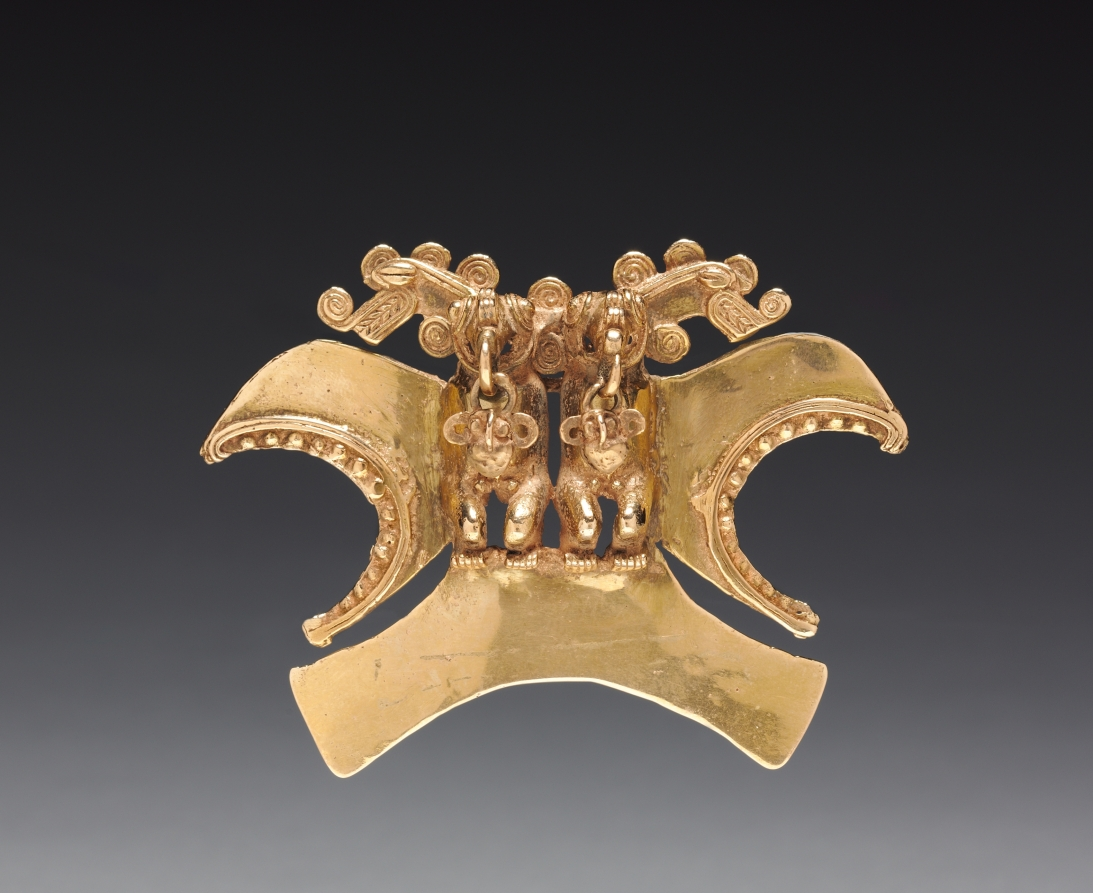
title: Double Bird-Headed Figure Pendant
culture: Costa Rica, Diquís region, 11th-16th century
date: c. 1000–1500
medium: cast and hammered gold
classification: Metalwork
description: Among the pendants shown here are a crustacean (1943.290), an animal-headed figure (1948.18), and two pendants featuring birds (1951.442 and 1946.223). The latter were dubbed aguilas (eagles) by Christopher Columbus, who saw natives wearing them as necklace ornaments. Modern researchers are not as sure of the species shown, but some believe that they are birds of prey because talons and beaks are prominent and often clutch something, in one example here a small, disembodied head that holds a clapper. In both examples, two tufts in the form of crocodiles in profile flank the birds’ heads.